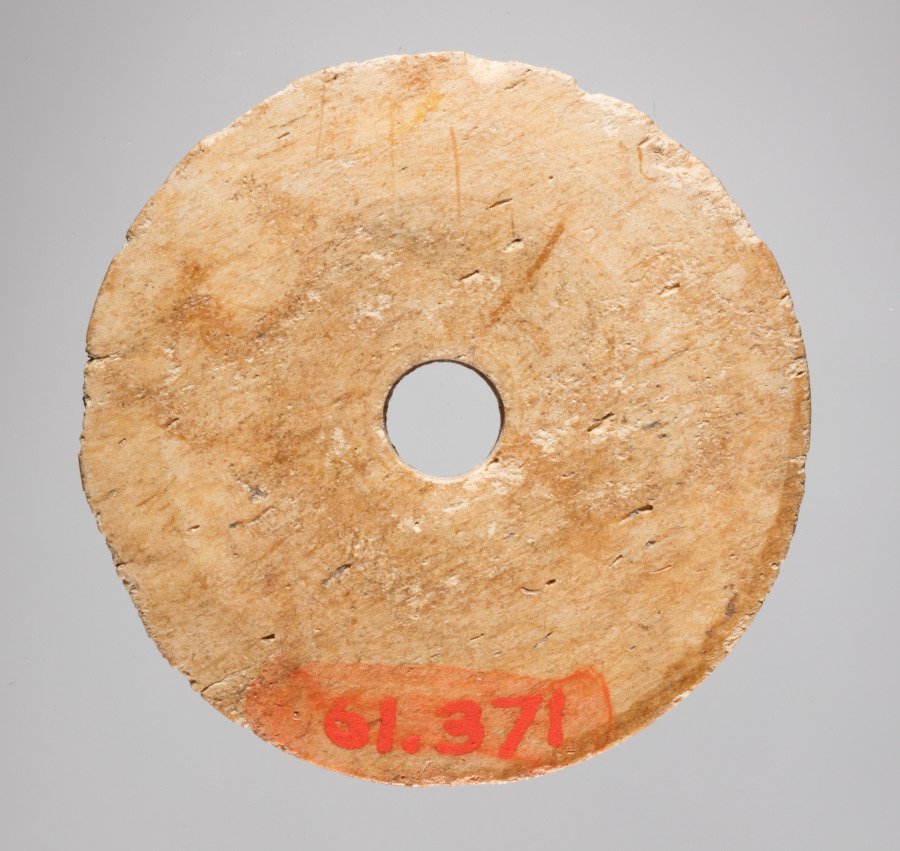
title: Spindle Whorl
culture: Iran, early Islamic period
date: 700s - 900s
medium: bone, incised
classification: Spindle Whorl